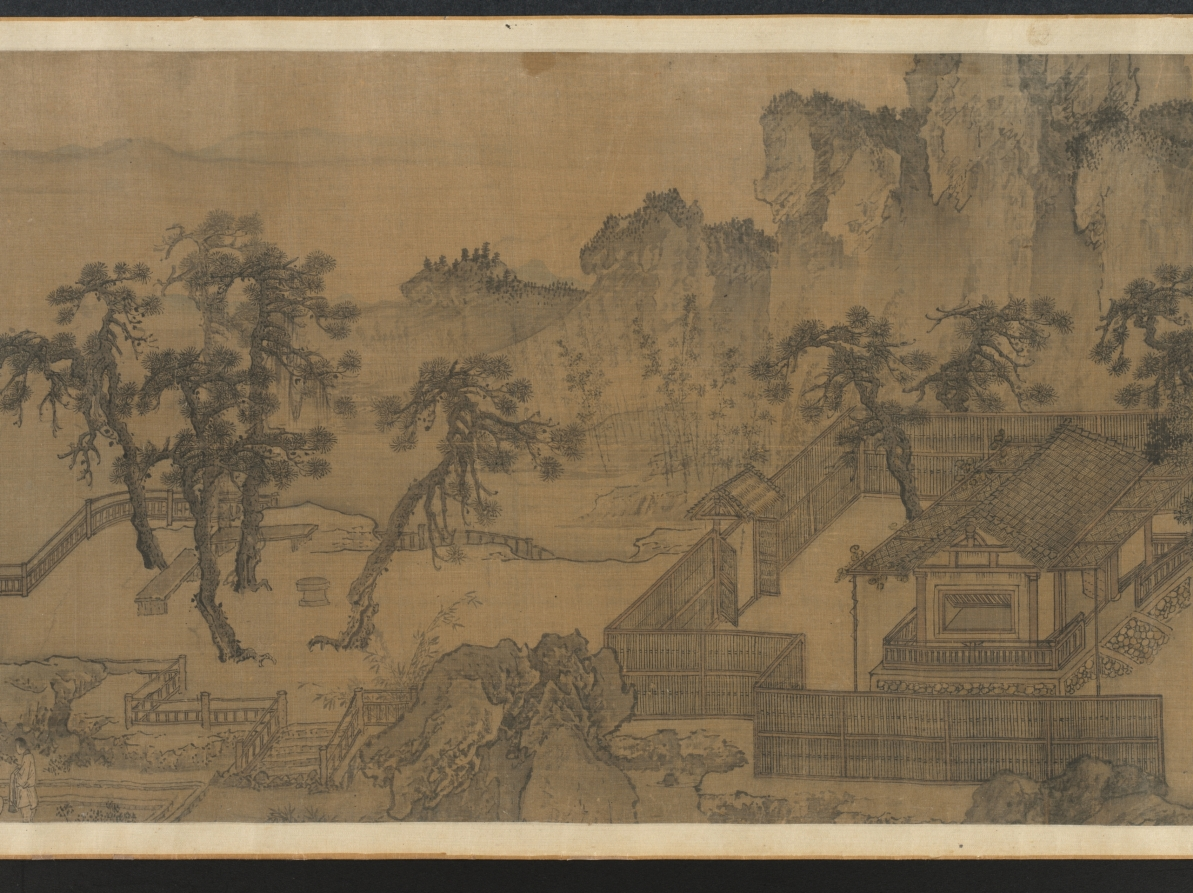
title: Tao Yuanming's Return Home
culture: China, Yuan dynasty (1271-1368)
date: 1300s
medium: Handscroll; ink and slight color on silk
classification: Painting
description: Tao Yuanming's revered poem "Return Home 歸去來辭 (Gui qu lai ci)" powerfully conveys his desire to leave bureaucratic life for the simplicity and authenticity of nature. This sentiment has deeply resonated with generations of Chinese scholars, making it a popular theme in paintings. This handscroll uses continuous narrative depicting Tao in multiple scenes from the poem. Starting on the right, the poet travels to his home. His children wait by the gate, while his wife pauses to tidy her hair before welcoming him. Then, free from the burdens of official service, Tao spends time in both nature and his cottage, where he can again enjoy wine, music, and books.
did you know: Poet Tao Yuanming 陶淵明 (c. 365–427 CE) returned to a secluded life instead of pursuing a civil service career.